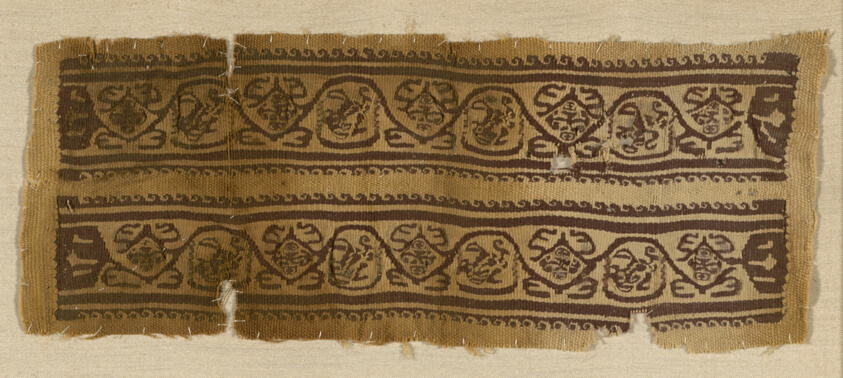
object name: Textile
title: Bands (From Tunic Cuff)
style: roman period (egyptian), coptic (period)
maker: Coptic; Egypt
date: Roman period (30 B.C.– 641 A.D.), 4th/6th century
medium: Wool, tapestry weave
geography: Egypt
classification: textile; weaving